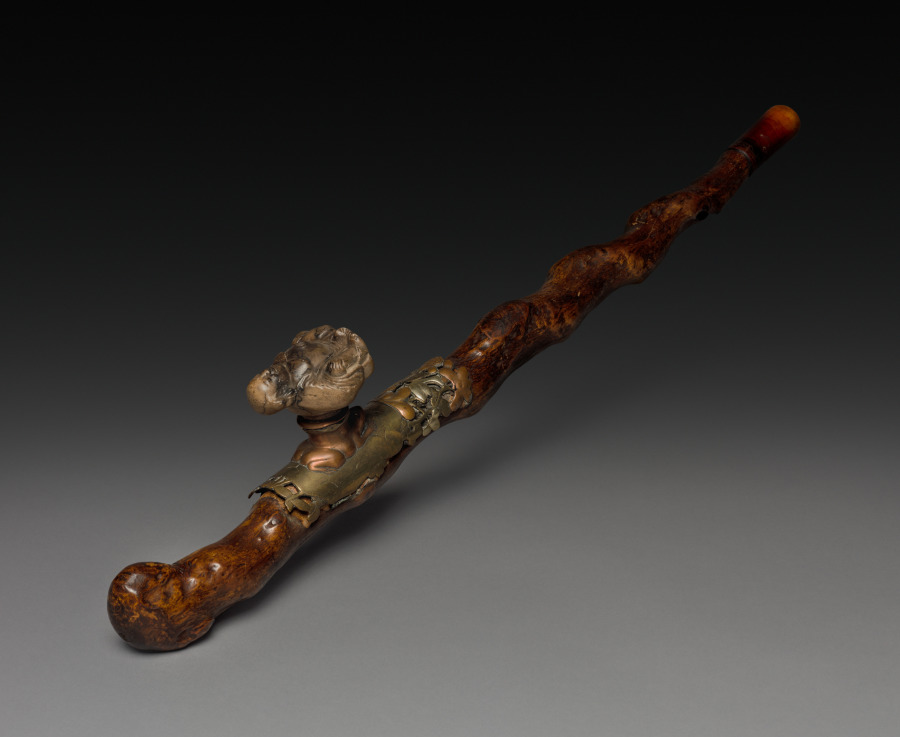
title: Opium Pipe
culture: China, Qing dynasty (1644-1911)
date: 1800s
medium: wood and ivory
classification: Miscellaneous